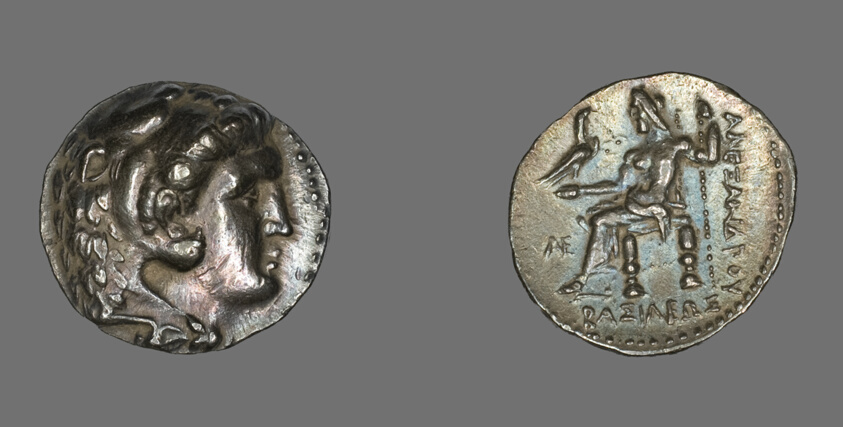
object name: Coin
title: Tetradrachm (Coin) Portraying Alexander the Great as Herakles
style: greek, ancient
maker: Greek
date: 336-323 BCE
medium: Silver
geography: Ancient Greece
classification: coin; ancient art